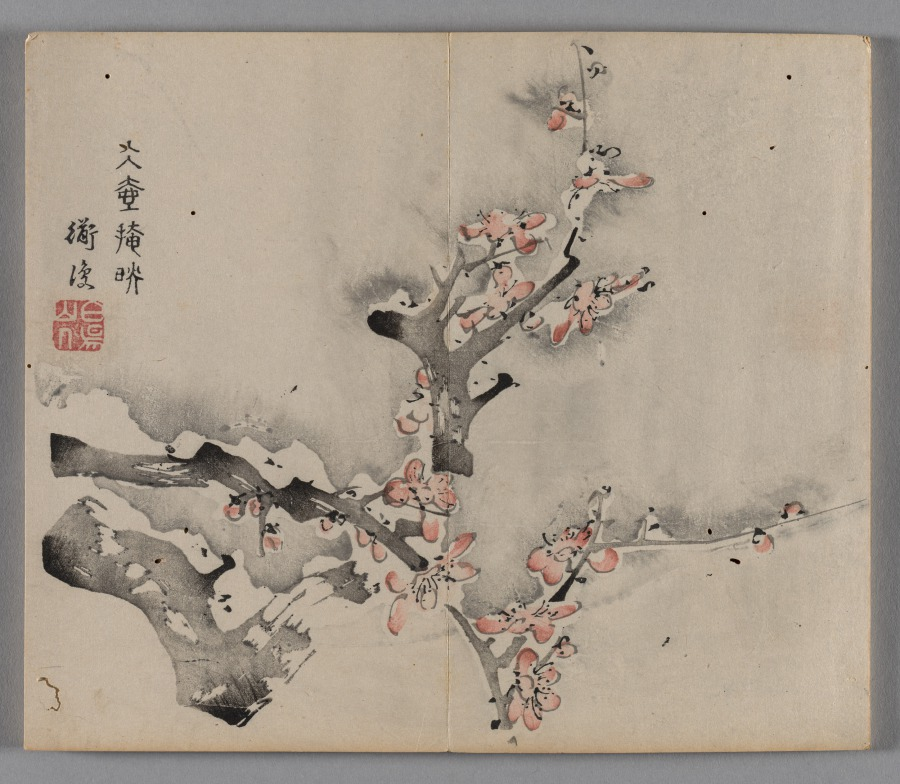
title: Ten Bamboo Studio Painting and Calligraphy Handbook (Shizhuzhai shuhua pu): Plum Blossoms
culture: China, Qing dynasty (1644-1911)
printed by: Hu Zhengyan (Chinese, c. 1584–1674)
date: 1633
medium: Woodblock-printed book; ink and colors on paper; first edition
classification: Print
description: Color printing reached a level of perfection in the early 1600s, as seen in this Ten Bamboo Studio Collection of Calligraphy and Painting and the Mustard Seed Garden Manual of Painting (printed 1679 and 1701). The painterly quality, precision in registering (aligning) the woodblocks, and harmonious colors made them the most successful color print editions in Chinese history. Both editions were printed and compiled in Nanjing, spread nationwide, and had a great impact on the arts in Japan and Korea.